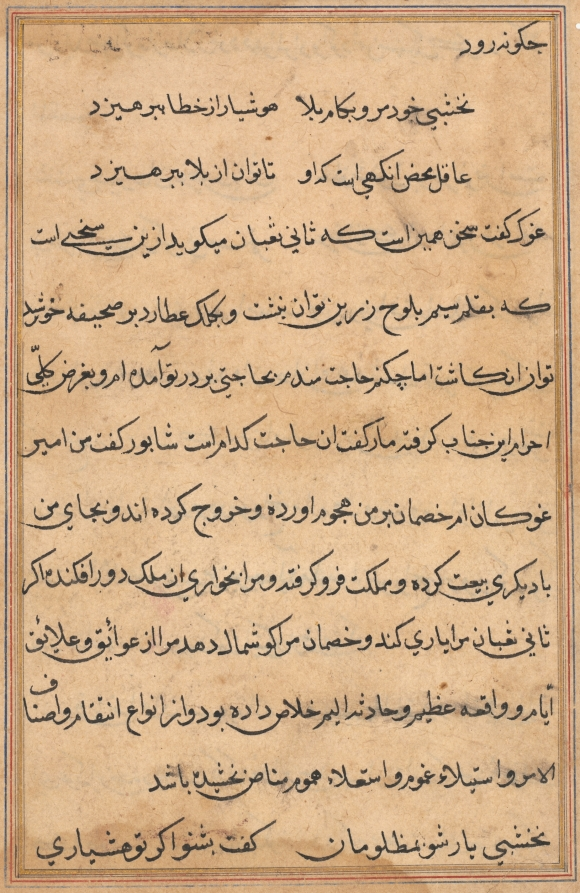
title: Page from Tales of a Parrot (Tuti-nama): text page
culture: Mughal India, court of Akbar (reigned 1556–1605)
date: c. 1560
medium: gum tempera, ink, and gold on paper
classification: Painting